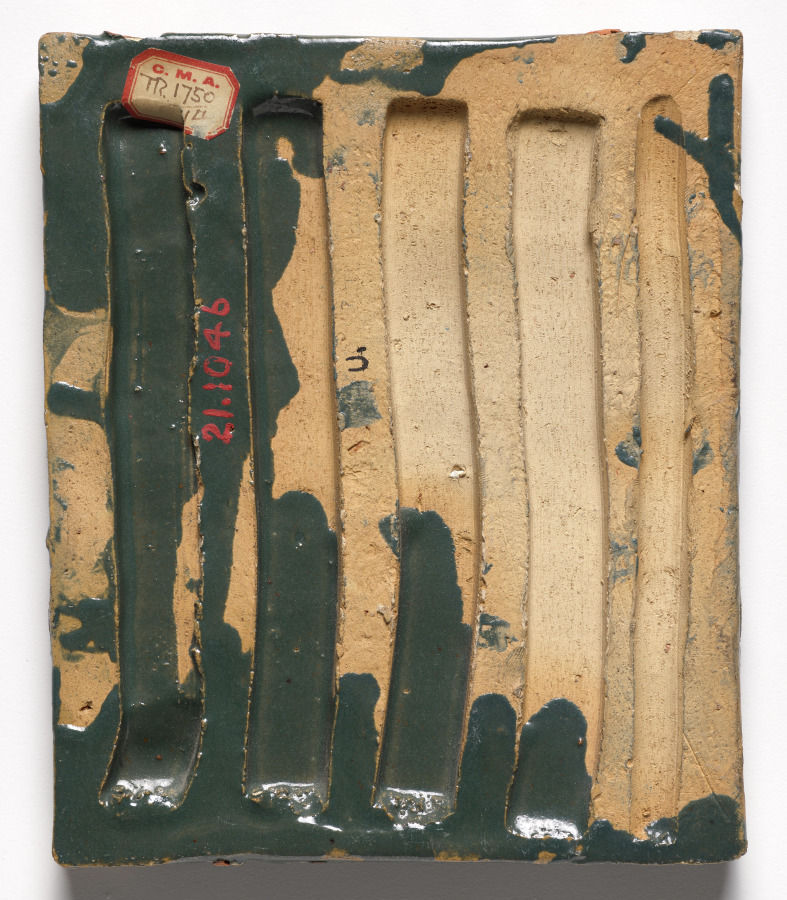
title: Tile- Double-Headed Eagle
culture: America, Pennsylvania, Doylestown, Early 20th century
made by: Moravian Pottery and Tile Works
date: before 1921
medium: glazed ceramic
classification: Ceramic